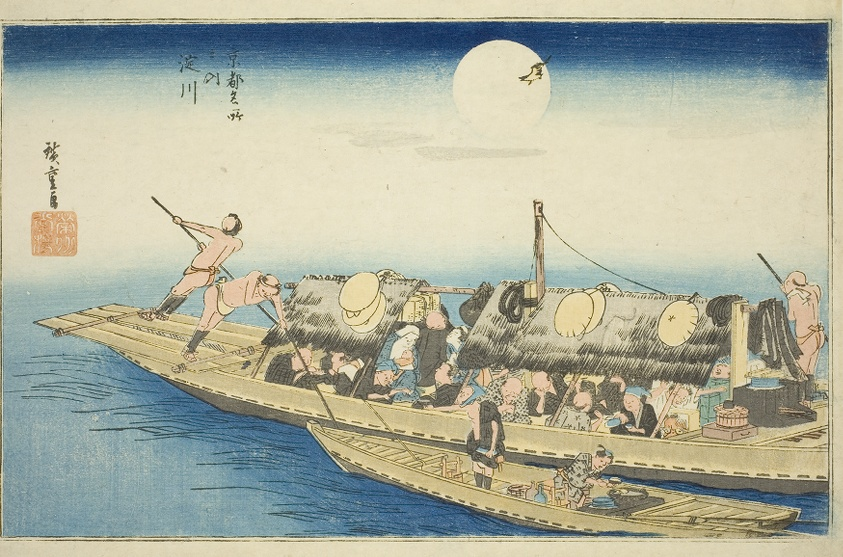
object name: Print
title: Yodo River (Yodogawa), from the series "Famous Places in Kyoto (Kyoto meisho no uchi)"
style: Japanese (culture or style)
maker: Utagawa Hiroshige 歌川 広重; Japanese, 1797-1858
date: c. 1834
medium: Color woodblock print; oban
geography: Japan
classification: woodblock print; print; asian art